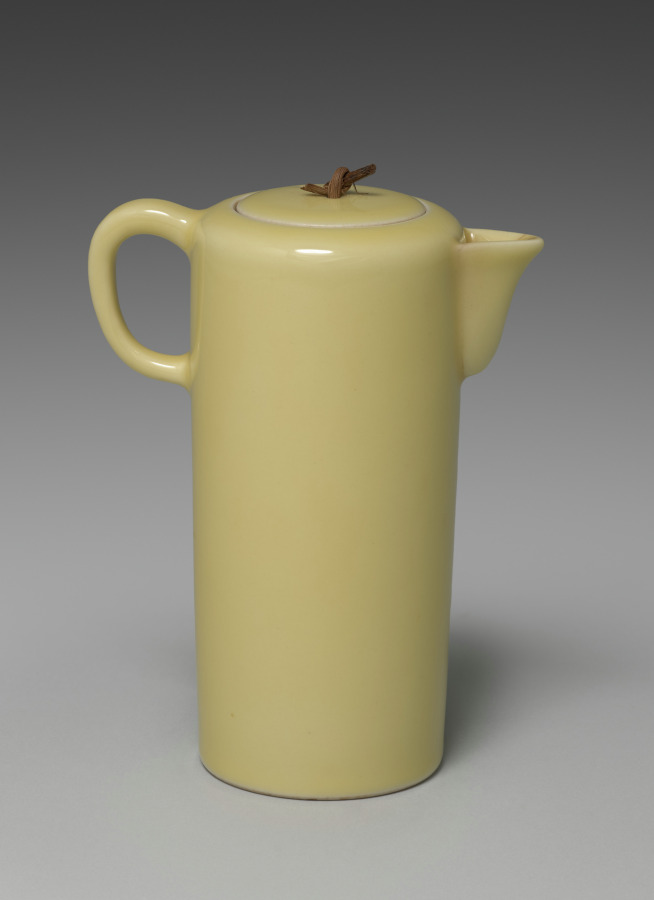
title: Sake Pourer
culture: Japan, Taishō period (1912–26) or Shōwa period (1926–89)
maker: Seifū Yohei IV (Japanese, 1872–1951)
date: 1914–46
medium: One of a pair of sake pourers; porcelain with yellow glaze and bamboo lid handles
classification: Ceramic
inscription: 清風造 。 【印】 清風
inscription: 成山清風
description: Like his father, Yohei IV also produced works with red or yellow monochrome glazes. His yellow-glazed works include this pair of sake pourers, a set of five drinking cups CMA 2022.217, and a sweets bowl molded into the shape of a chrysanthemum CMA 2022.218.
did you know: The lid's handle is made of bamboo.